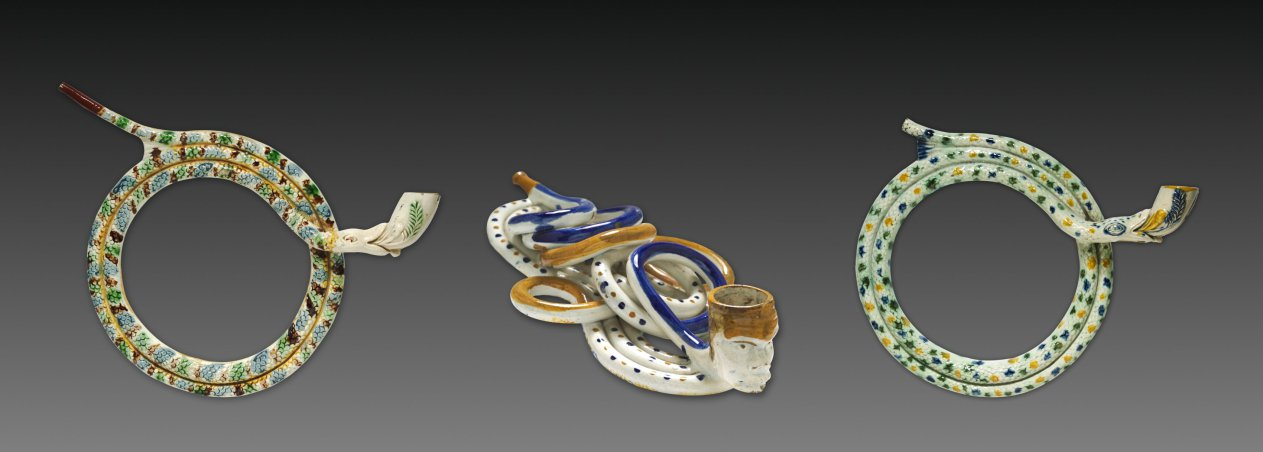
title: Pipe in the Form of Coiled Snake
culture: England, Staffordshire, late 18th-early 19th Century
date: 1780–1820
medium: lead-glazed earthenware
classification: Ceramic